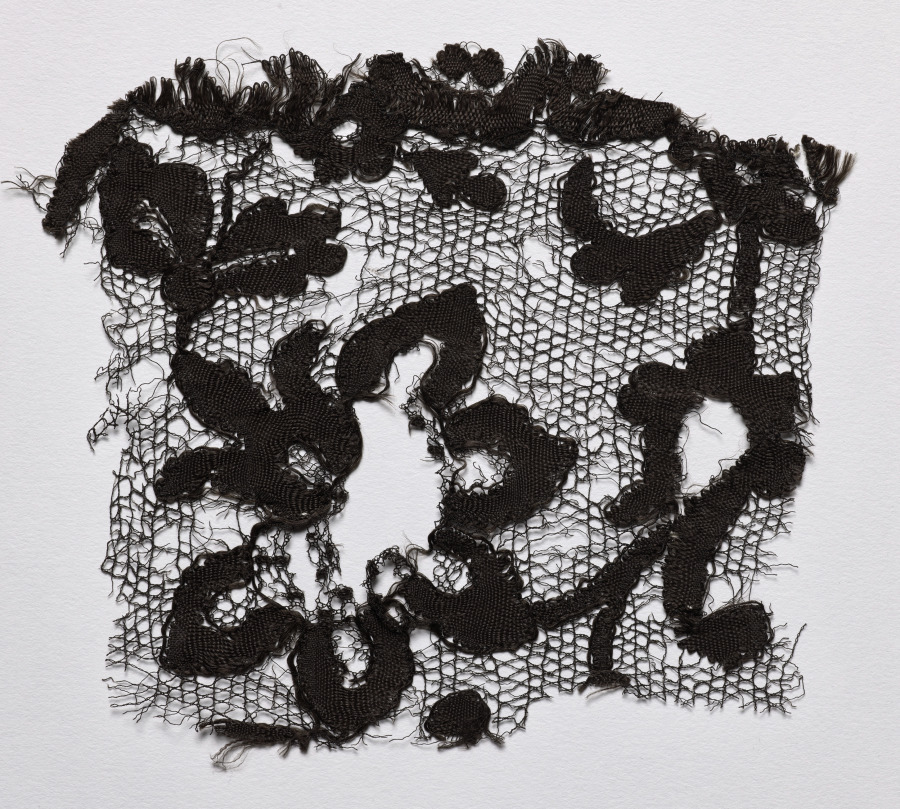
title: Lace Fragment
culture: Spain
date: 1800s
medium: Silk: bobbin lace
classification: Lace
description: This type of lace would have been used to make a traditional mantilla (a veil worn over the head and shoulders).